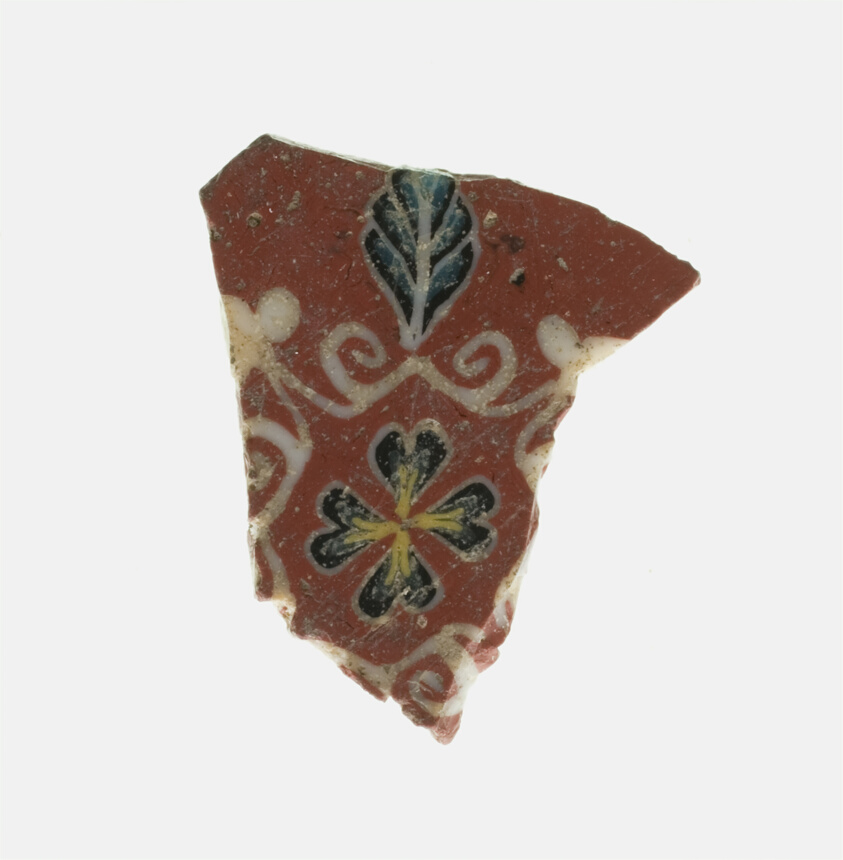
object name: Decorative Arts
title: Fragment of a Floral Inlay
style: greco-roman (egyptian), egyptian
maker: Egyptian or Roman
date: Ptolemaic Period–Roman Period, (1st century BCE–1st century CE)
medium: Glass, mosaic technique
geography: Italy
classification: glass; inlay; ancient art; decorative arts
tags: floral